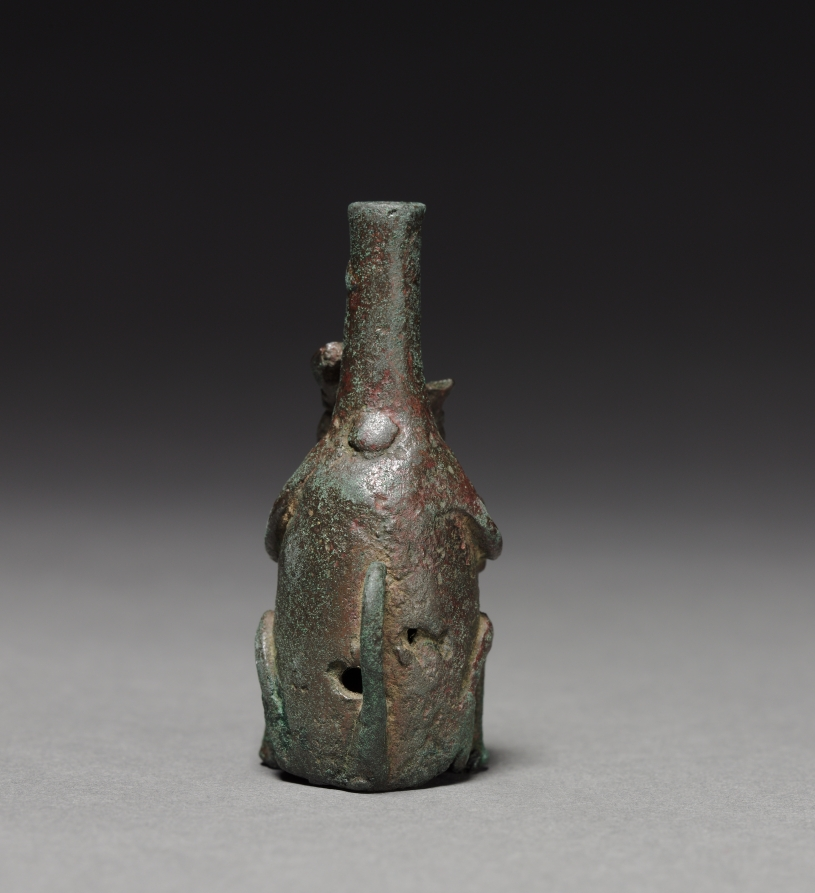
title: Feline Holding Human Figure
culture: Peru, North Coast, Moche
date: c. 100–500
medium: banded travertine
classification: Metalwork